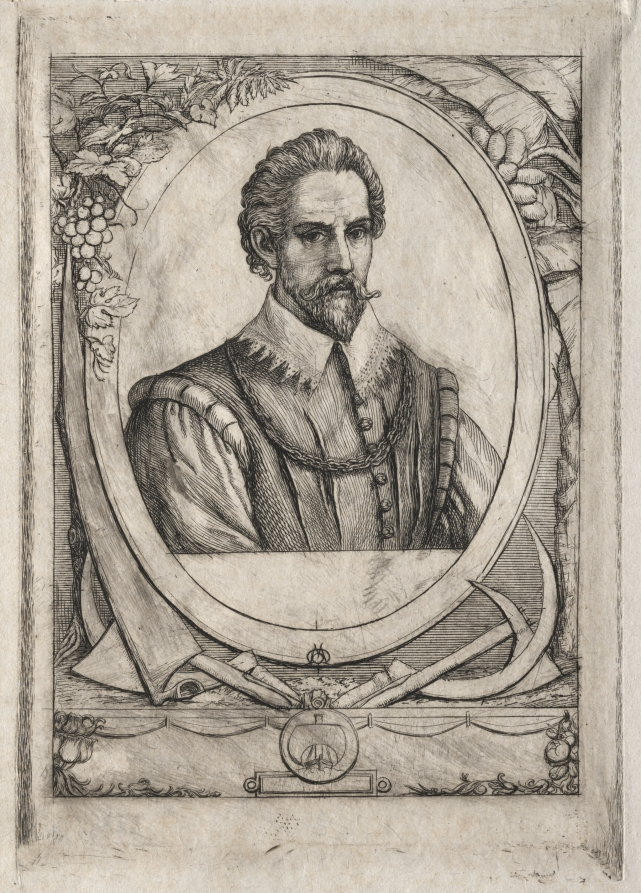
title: Rene de Laudonniere Sablais (de Burdingale)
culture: France, 19th century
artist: Charles Meryon (French, 1821–1868)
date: 1861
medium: etching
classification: Print